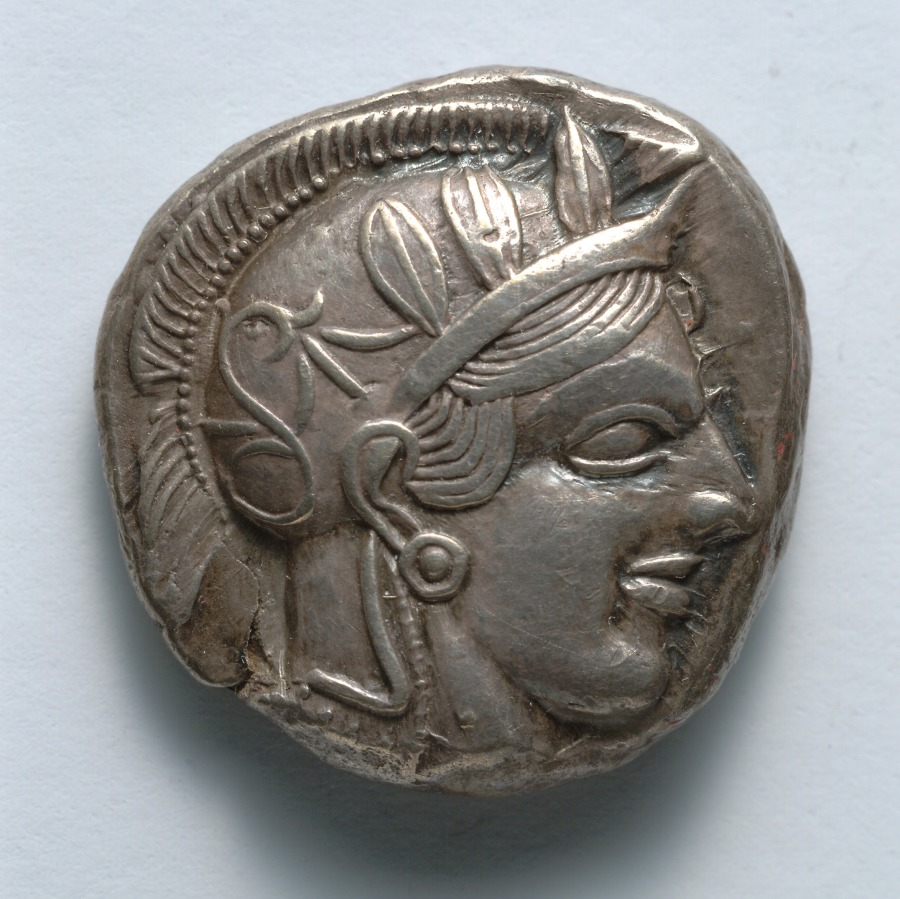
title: Tetradrachm: Head of Athena (obverse); Owl (reverse)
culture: Greek, minted at Athens (Attica)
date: 449–407 BCE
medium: silver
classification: Coins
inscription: ΑΘΕ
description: Incorporating the first three letters of the city name—ΑΘΕ—with then-iconic images of the patron goddess Athena and her owl, the Athenian tetradrachm was among the most widely traded and most recognizable coins of the ancient world. The olive leaves on Athena’s helmet and the small crescent moon behind the owl date this coin after the Persian Wars.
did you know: The basic design of Athenian tetradrachms is now back in use, on Greek one-Euro coins.